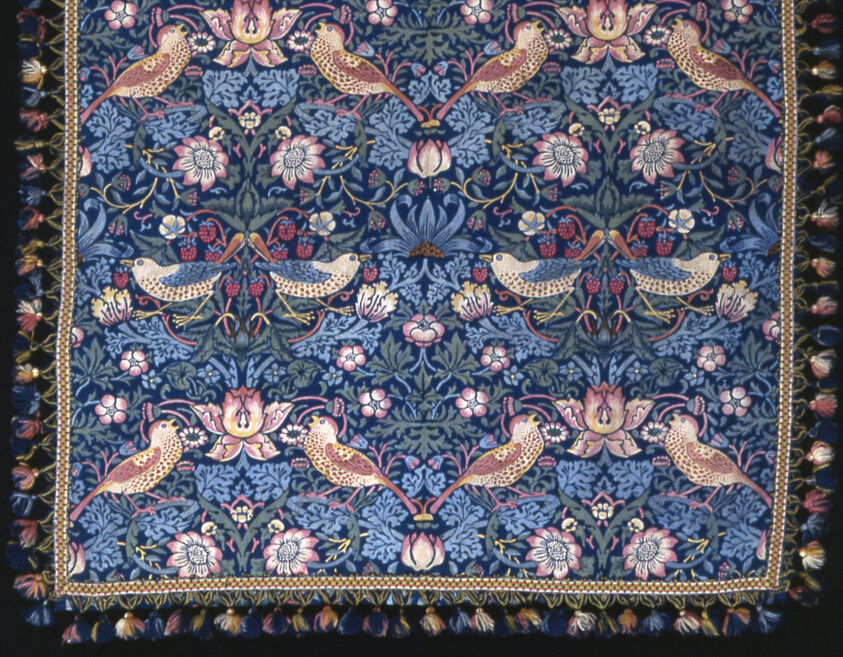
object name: Textile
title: Strawberry Thief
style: Arts and Crafts Movement, 19th century, british, 20th Century, British Arts and Crafts Movement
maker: Designed by William Morris (English, 1834–1896); Produced by Morris & Co., London (English, 1875–1940); Merton Abbey, London (English, 1881–1940)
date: Design 1883, made 1883–1917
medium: Cotton; plain weave, block printed, wool trim with tassels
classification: printed textile; textile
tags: birds, animals, eating, strawberries, fruit, flowers, floral motifs, foliage